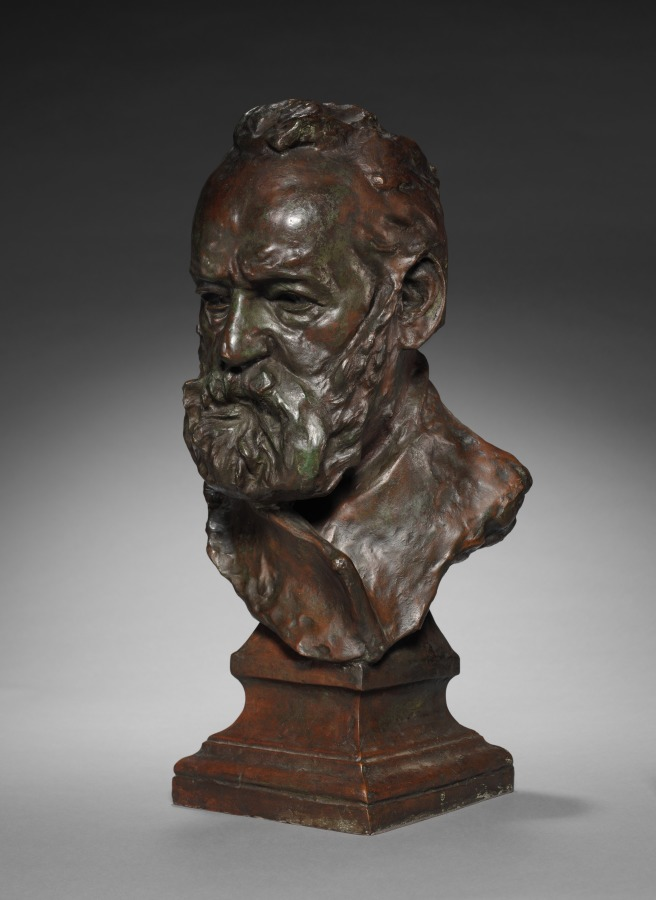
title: Bust of Victor Hugo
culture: France, 19th century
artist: Auguste Rodin (French, 1840–1917)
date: 1883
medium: bronze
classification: Sculpture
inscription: Signed beneath fold of drapery to left: "A. Rodin"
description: Unlike most of Rodin’s portraits, the bust of Victor Hugo (1802–1885) was made from memory because the famous French writer refused to sit for the artist. Among Hugo’s best-known novels are The Hunchback of Notre Dame (1831) and Les Misérables (1862).